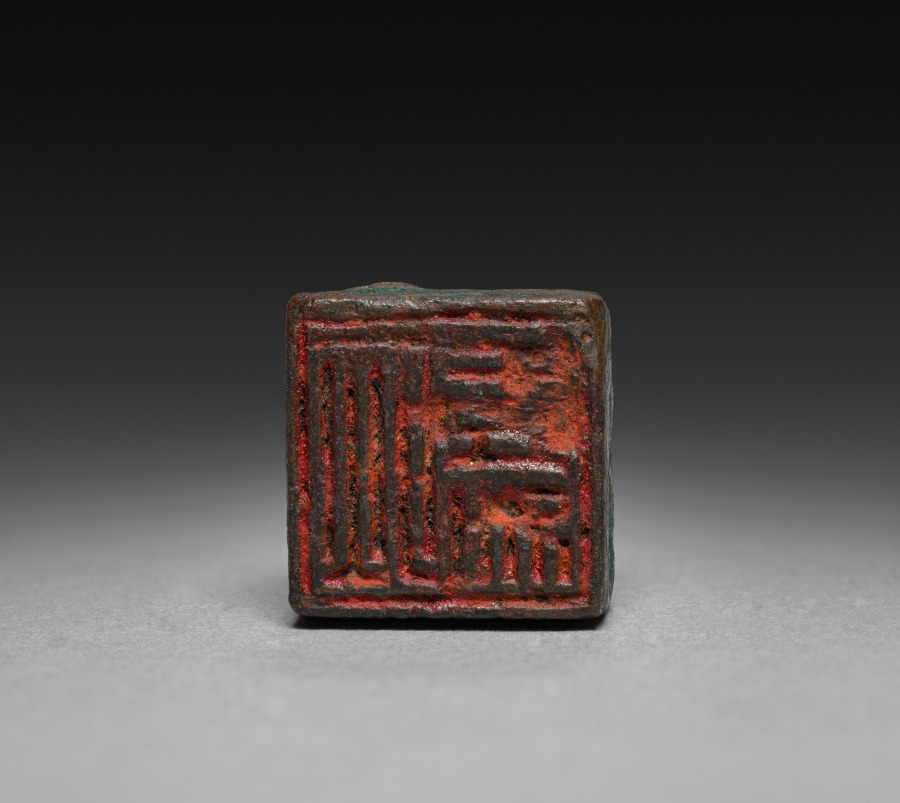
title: Chimera with Seal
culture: China, Eastern Han dynasty (25–220 CE)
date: 200s CE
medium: bronze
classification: Glyptic